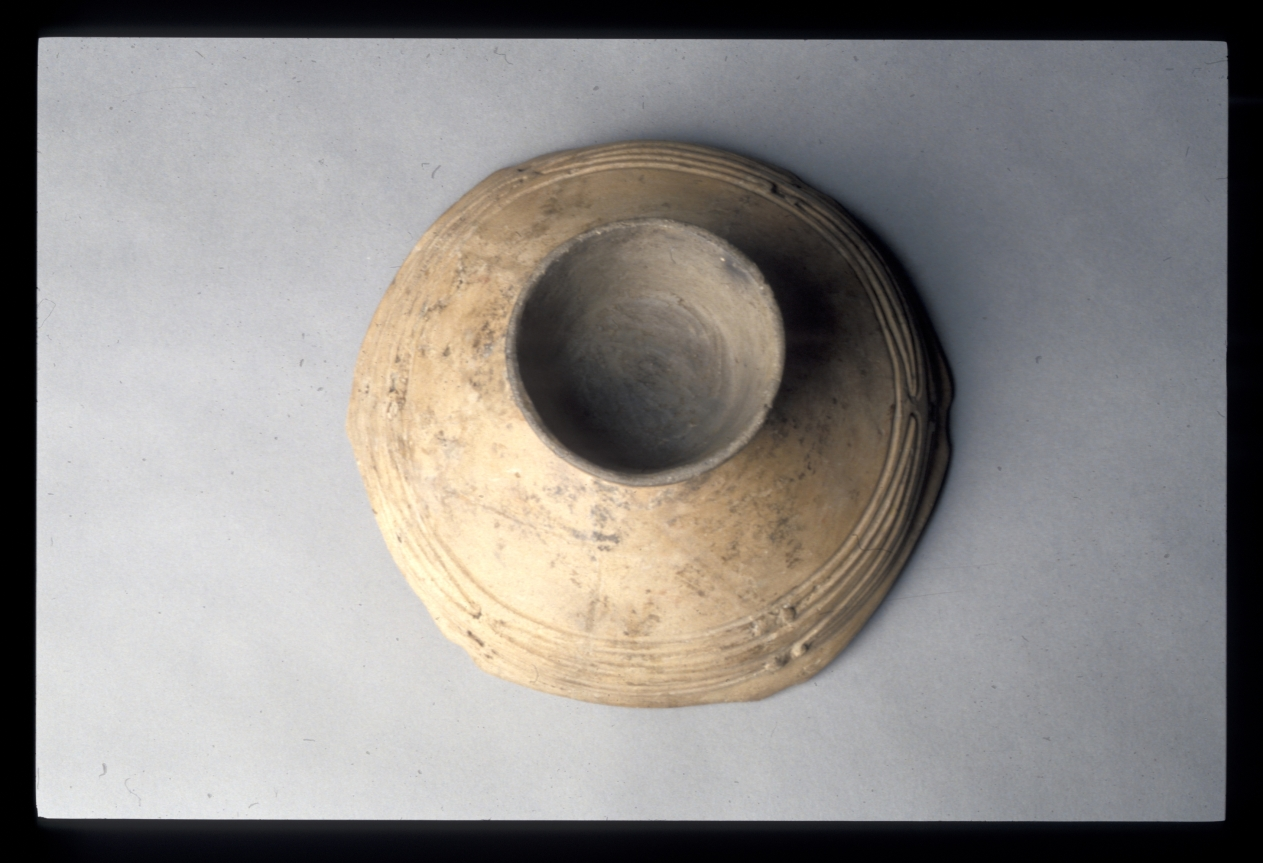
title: Pedestalled Dish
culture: Japan, Jōmon period (c. 10,500–300 BCE)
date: c. 1000–500 BCE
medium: burnished earthenware with carved and impressed decoration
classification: Ceramic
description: The Jomon period (10,500-300 BC) marks the beginning of the Japanese ceramic tradition, one of the most vibrant in world history. Major features such as an emphasis on asymmetrical silhouettes, great attention to surface texture, technological simplicity, and ambivalence to bright color already appear in this era. Late Jomon vessels are typically formed of a dense clay paste, and during this period, smaller serving vessels appear, in contrast to earlier deep storage or cooking vessel shapes. New types of surface decoration-carved rather than impressed into the clay body-herald the arrival of a distinctive aesthetic. The attachment of the pedestal to this shallow bowl, as well as the vessel's rather thin walls, also identify a new stage in ceramic production in Japan.